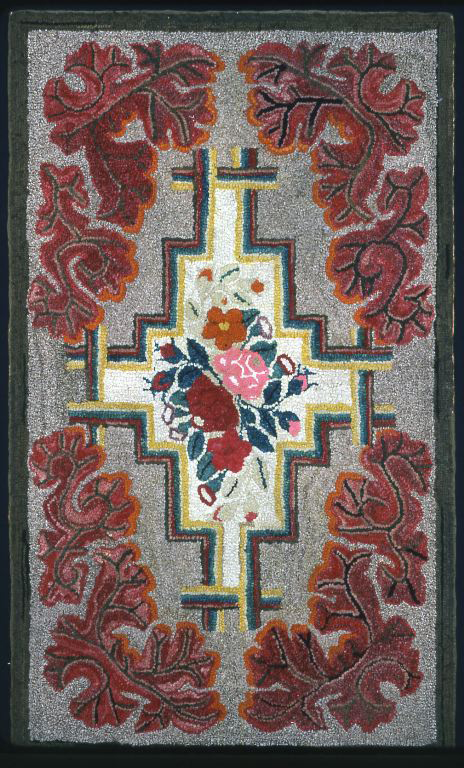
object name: Textile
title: Rug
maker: United States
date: 19th century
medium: Jute, plain weave with wool and cotton yarn, knitted and woven strips forming "hooked" pile; edged with cotton and wool, twill weave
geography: United States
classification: textile; needlework - rug